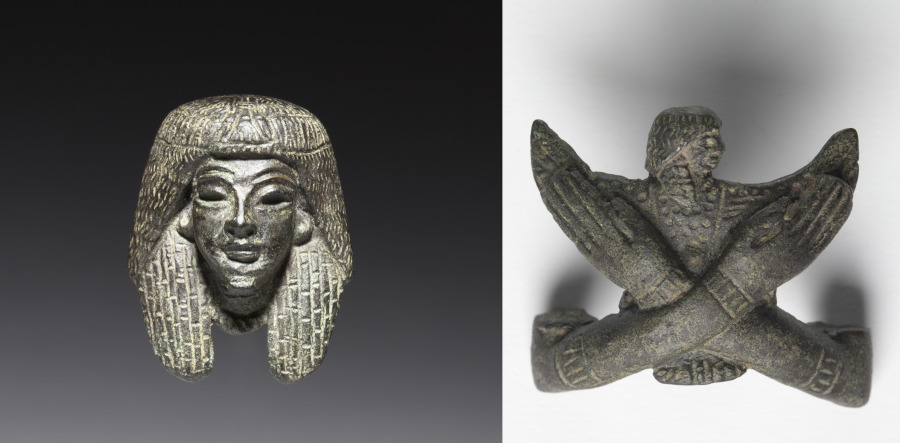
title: Bronze mounts from a "Shawabty Bundle"; Head and Crossed Arms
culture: Egypt, Thebes, Wadi Qubbanet el-Qirud, New Kingdom (1540–1069 BCE), Dynasties 18–19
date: c. 1336–1256 BCE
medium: head; bronze face, black copper wig, with traces of gilding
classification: Funerary Equipment